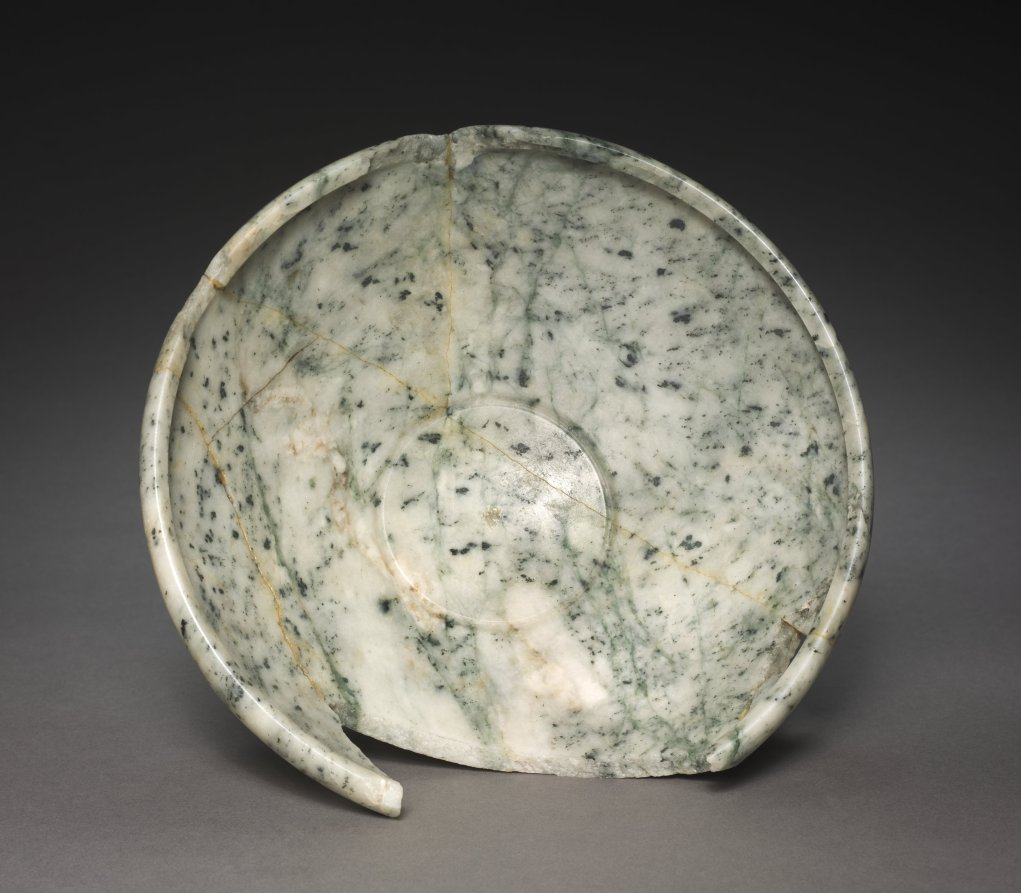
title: Dish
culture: Egypt, Early Dynastic (2950–2647 BCE), Dynasties 2–3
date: 2770–2573 BCE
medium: anorthosite gneiss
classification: Vessels